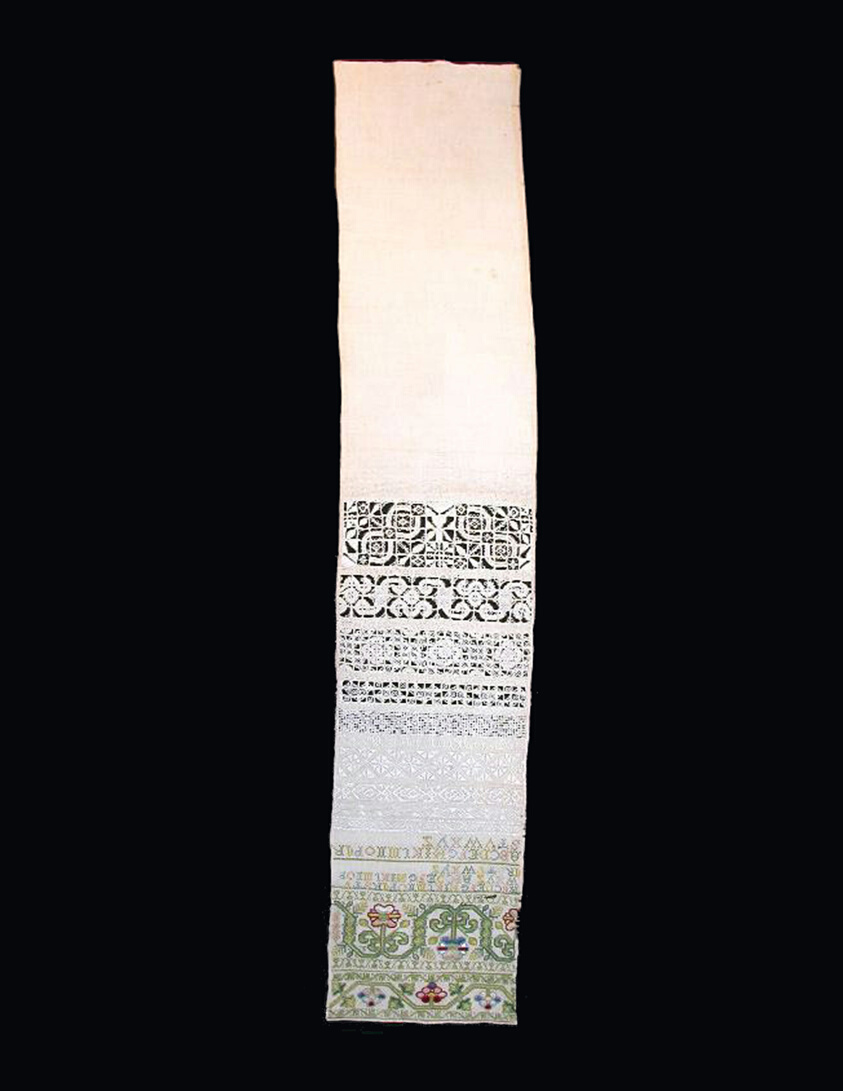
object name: Textile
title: Sampler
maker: Mercy Mackett (English, active c. 1688); England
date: 1688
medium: Linen, plain weave; with bands of cut and drawn thread work in back, buttonhole, darning, double hem, interlocking lace, overcast, and needle lace filling stitches; bands of linen, needle lace; and bands embroidered with silk in Algerian eye, Antwerp edge, back, cross, double hem, double running, long-armed cross, two-sided Italian cross, satin, squared ground, and a variety of buttonhole stitches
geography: England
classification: textile; needlework (visual works); sampler